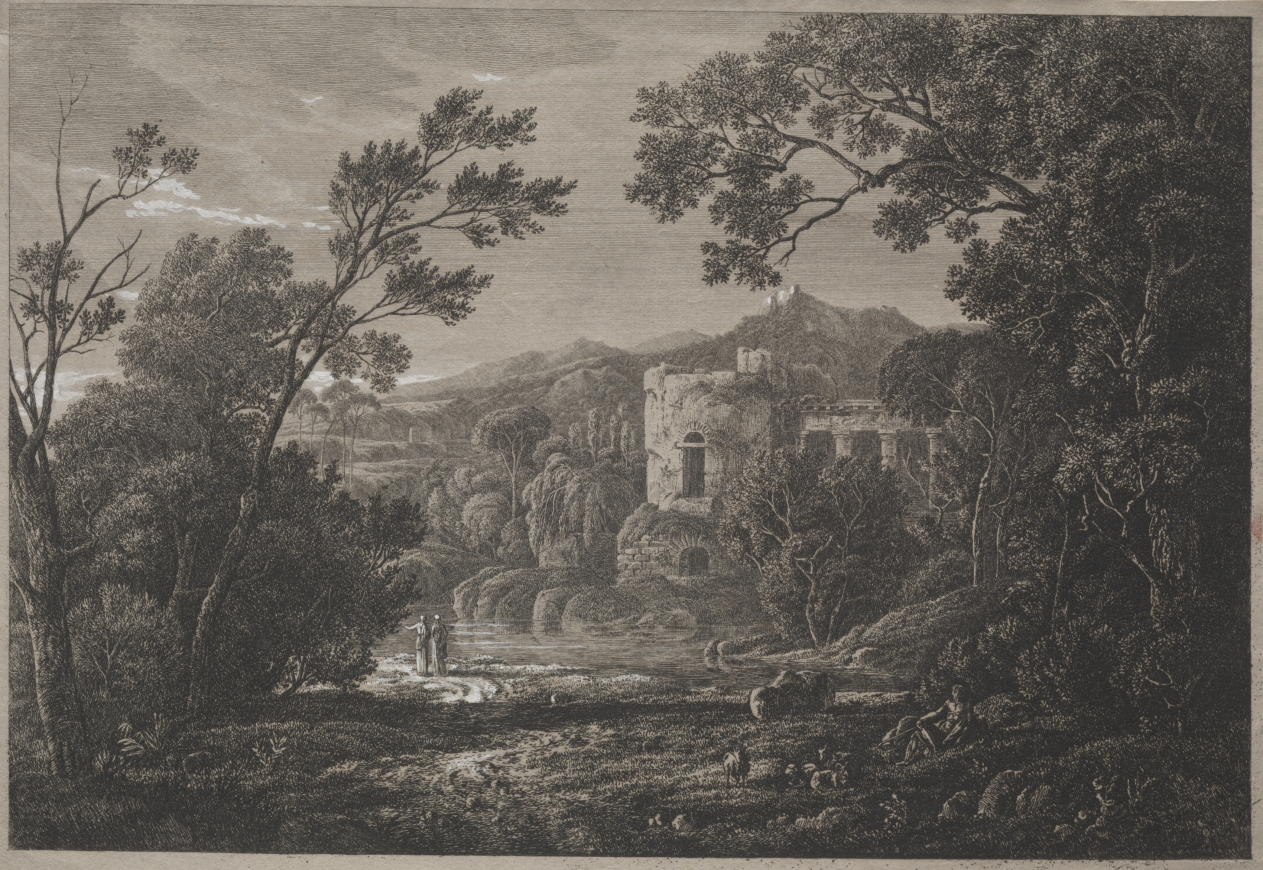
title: An Italian View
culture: Austria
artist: Joseph Rebell (Austrian, 1787–1828)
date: c. 1810?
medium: etching heightened with white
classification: Print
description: Rebell’s early work, such as this Italian view, had strong overtones of classicism and was influenced by Claude Lorrain’s heroic depictions of the landscape. Rebell spent long periods in Italy, first visiting Milan in 1810, Naples in 1813, and Rome in 1816. More active as a painter, he made a small number of prints. This evocative etching printed on brown paper and enlivened with white heightening reveals his painterly inclinations.